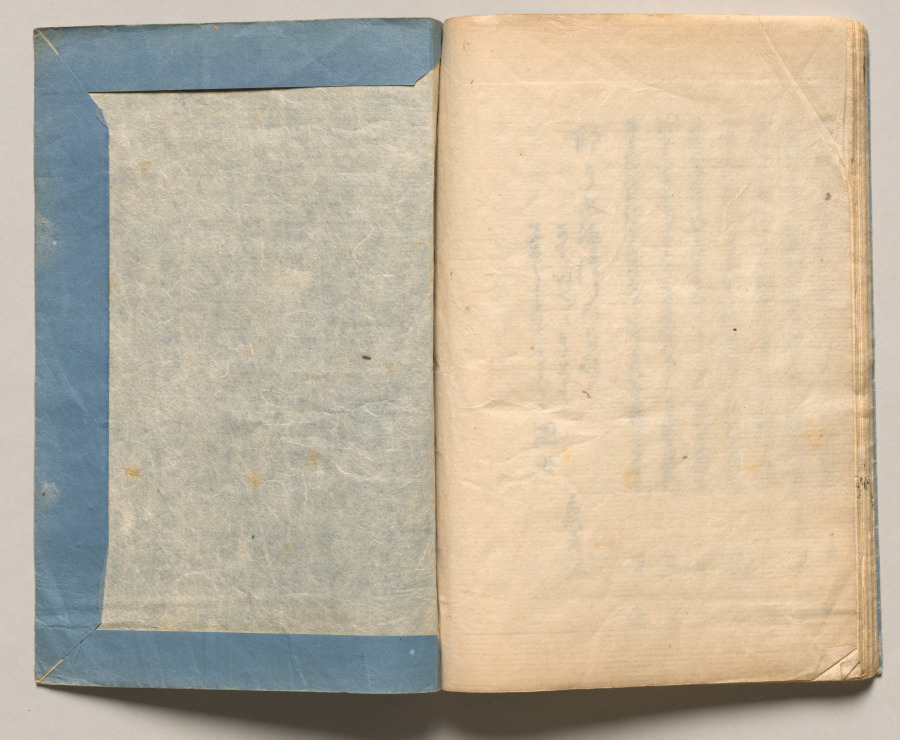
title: Volume One of People of Japan in Light Verse (Kyōka)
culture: Japan, Edo period (1615–1868)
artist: Utagawa Hiroshige (Japanese, 1797–1858)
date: 1857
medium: Woodblock-printed book; ink and color on paper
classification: Bound Volume